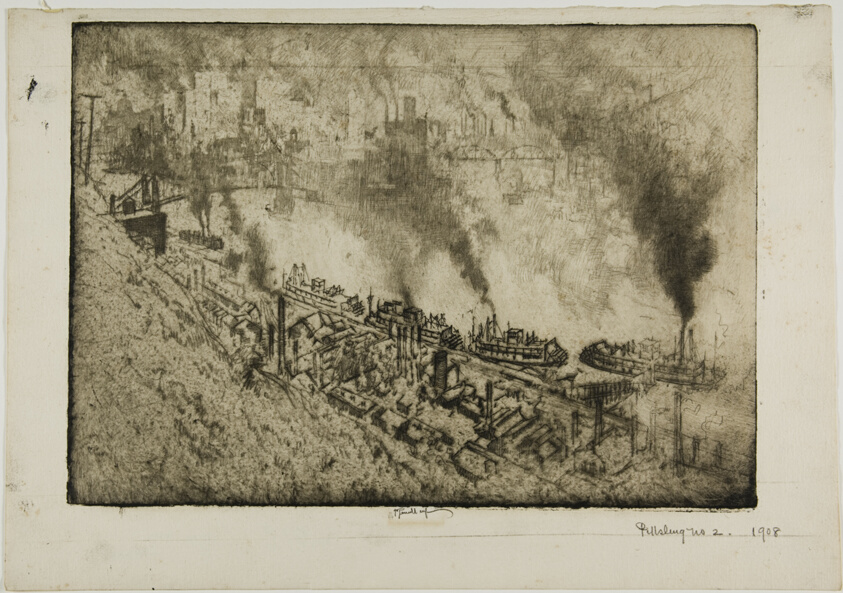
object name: Print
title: Pittsburg, No. II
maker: Joseph Pennell (American, 1857-1926)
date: 1909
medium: Etching and drypoint on ivory laid paper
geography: United States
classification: etching; print; prints and drawing; drypoint